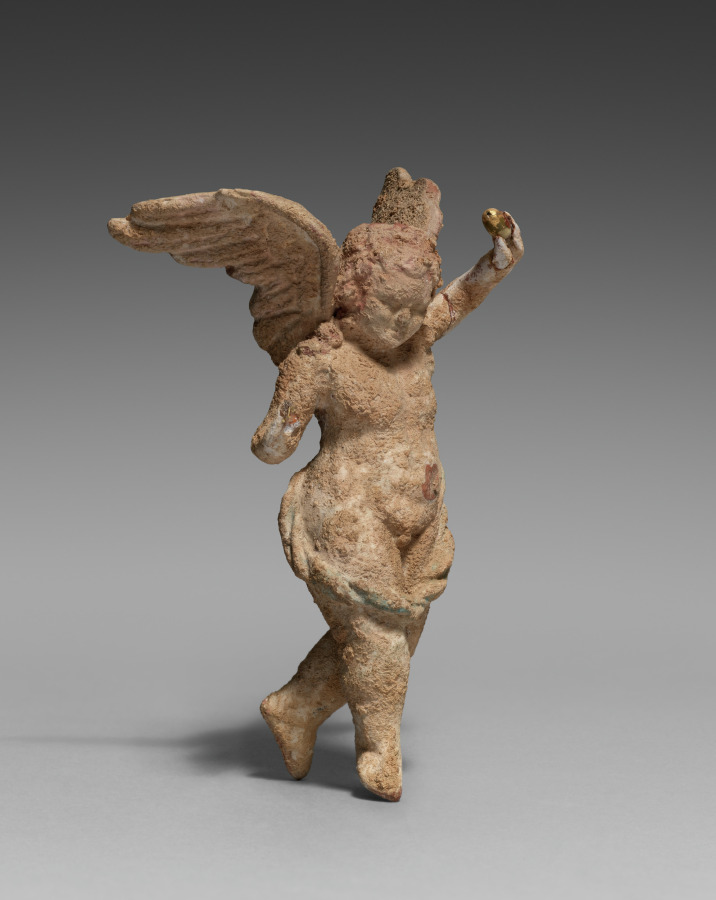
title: Figurine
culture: Greece, Myrina, Hellenistic period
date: late 400s–300s BCE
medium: terracotta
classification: Sculpture